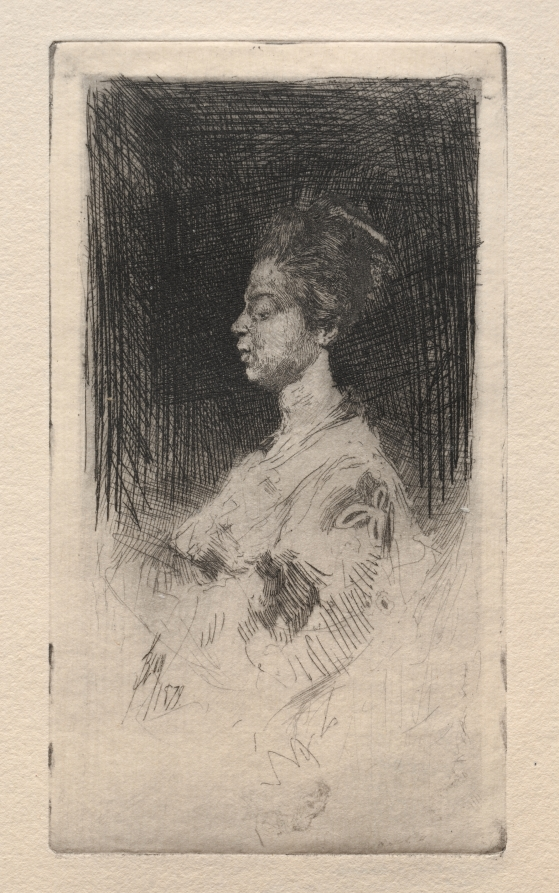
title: Profile Head of a Japanese Girl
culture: America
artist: Robert Frederick Blum (American, 1857–1903)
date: 1879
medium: etching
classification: Print